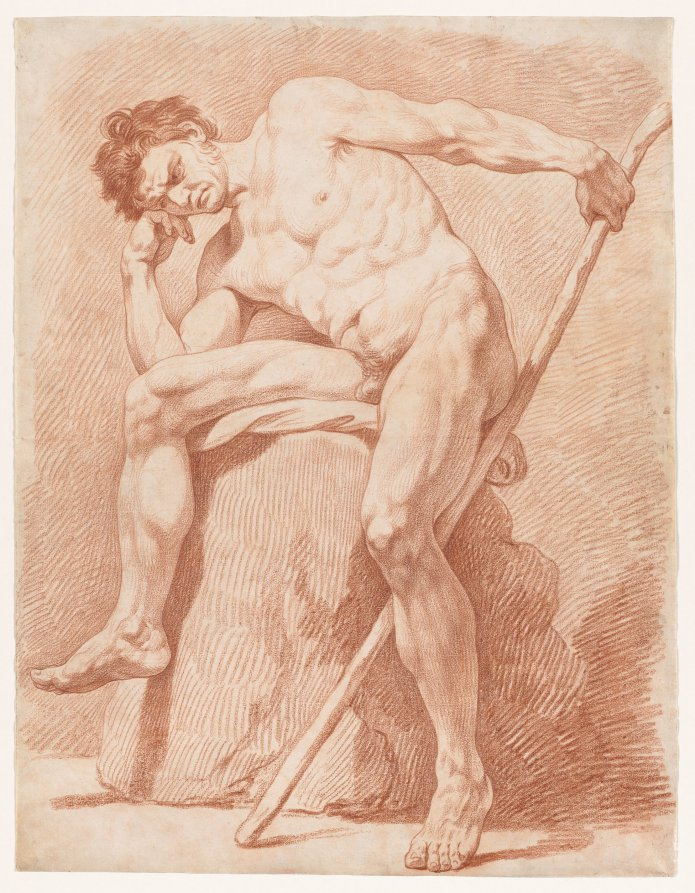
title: Academy of a Seated Nude Holding a Staff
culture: France, 18th century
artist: Edmé Bouchardon (French, 1698–1762)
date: c. 1735/50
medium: red chalk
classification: Drawing